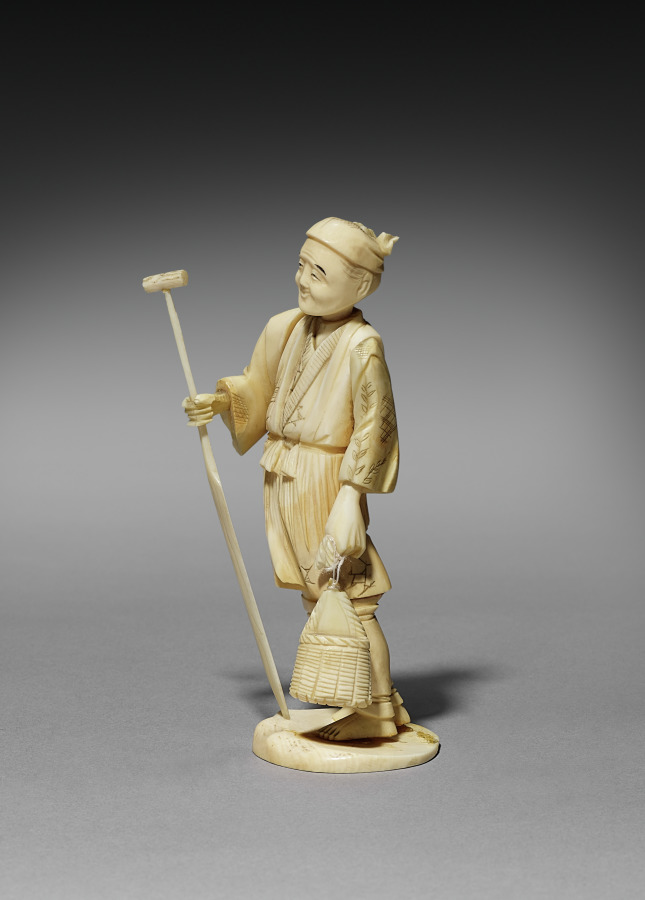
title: Man with a Basket and Paddle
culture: Japan, Meiji period (1868–1912)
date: late 1800s-early 1900s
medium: ivory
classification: Ivory